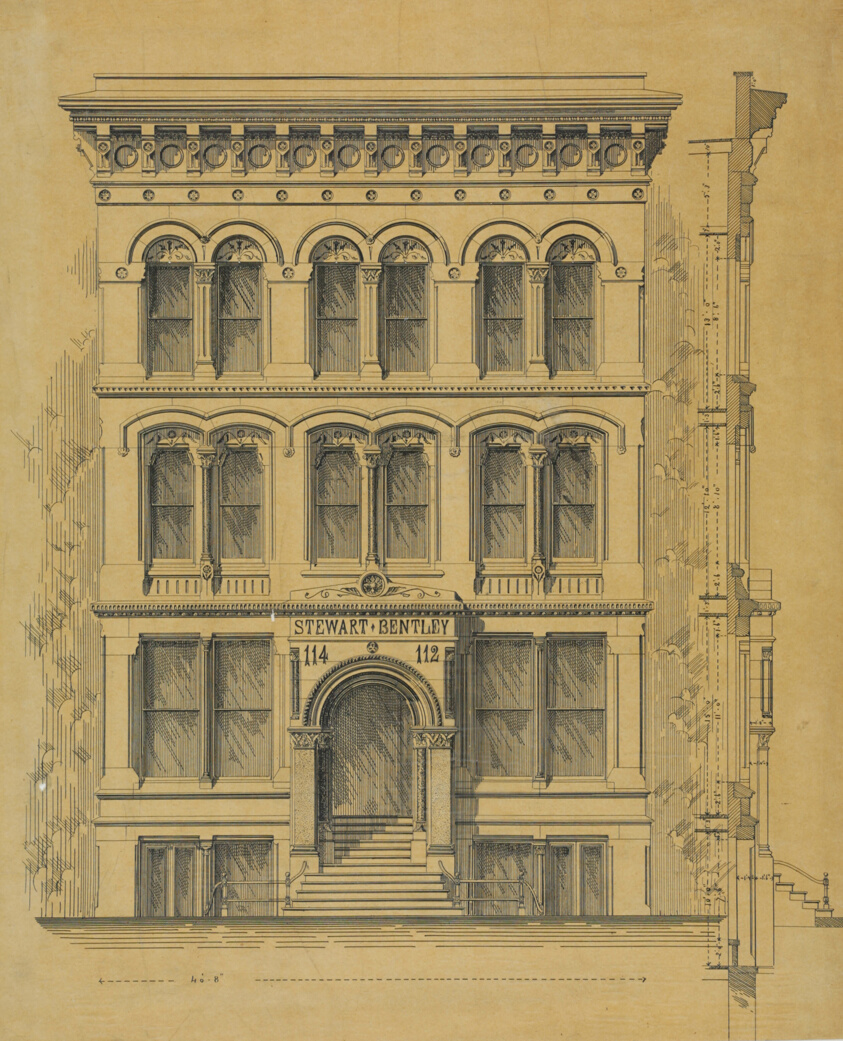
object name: Architectural Drawing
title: Stewart–Bentley Building, Chicago, Illinois, Elevation and Exterior Wall Section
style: 19th century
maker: Carter, Drake and Wight (American, 1871–1873); John Wellborn Root (American, 1850–1891); Peter Bonnett Wight (American, 1838–1925)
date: 1872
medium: Ink on tracing paper, mounted on heavy paper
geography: Dearborn Street, 30-32 North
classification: presentation drawing; architectural drawing; architecture; elevation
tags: Chicago, illinois, design, architecture, elevation, urban planning, buildings, architectural drawing, doorway, drawing, exterior, facade, ornament, windows